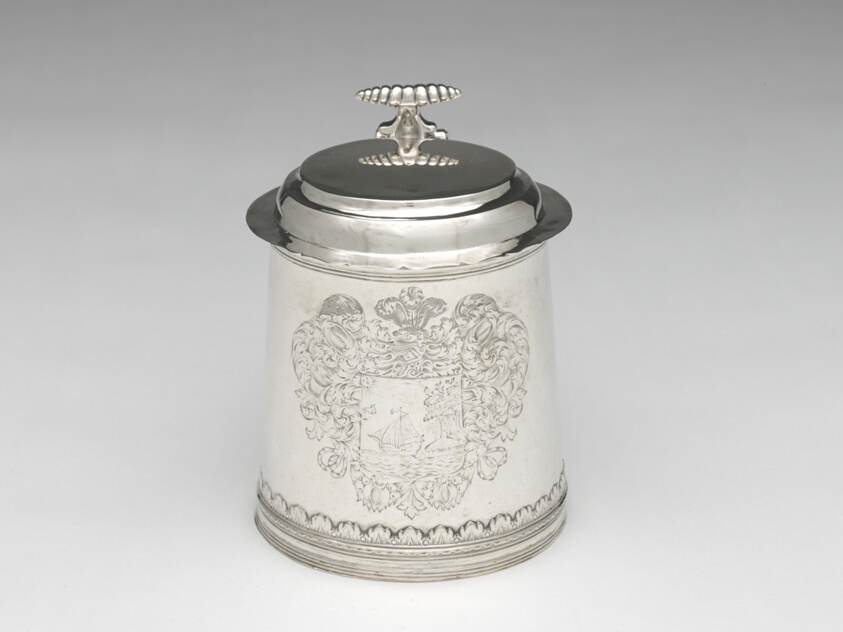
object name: Metalwork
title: Tankard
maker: Cornelius Kierstede; American, 1674–1757; New York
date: 1700–20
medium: Silver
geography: New York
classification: drinking vessel; silver; american decorative arts; american arts; decorative arts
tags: dining, drinking